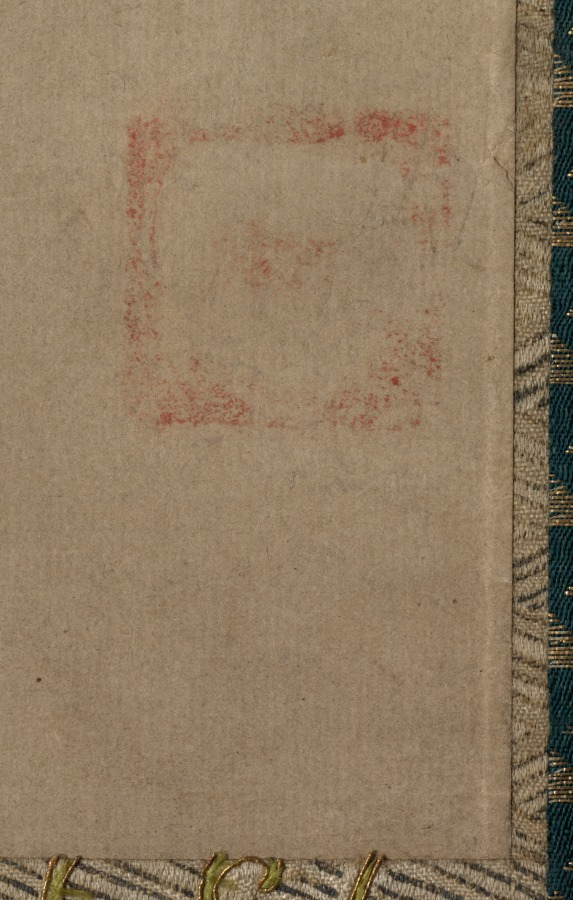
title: Courtesan and Attendants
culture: Japan, Edo period (1615–1868)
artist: attributed to Engetsudō (Japanese)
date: c. 1748–51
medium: hanging scroll; ink and color on paper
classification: Painting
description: The courtesan wears a pair of tall, lacquered wooden clogs and heavy robes, indicating it is winter. The elaborate span of her tortoiseshell comb in her fashionable coiffure enhances her glamorous appearance. Her blue-and-white striped obi is tied in a loose bow in front, typical for her profession. The round, stylized cherry blossom crest of her "house" (brothel), partially visible on her shoulder just above the shawl, also appears on the robes of her two attendants (kamuro). The attendants hold shuttlecocks, used in a game associated with New Year celebrations. One girl stares out at the viewer; the other looks back. The frontal view of the attendant’s face is somewhat rare in ukiyo-e painting and prints.